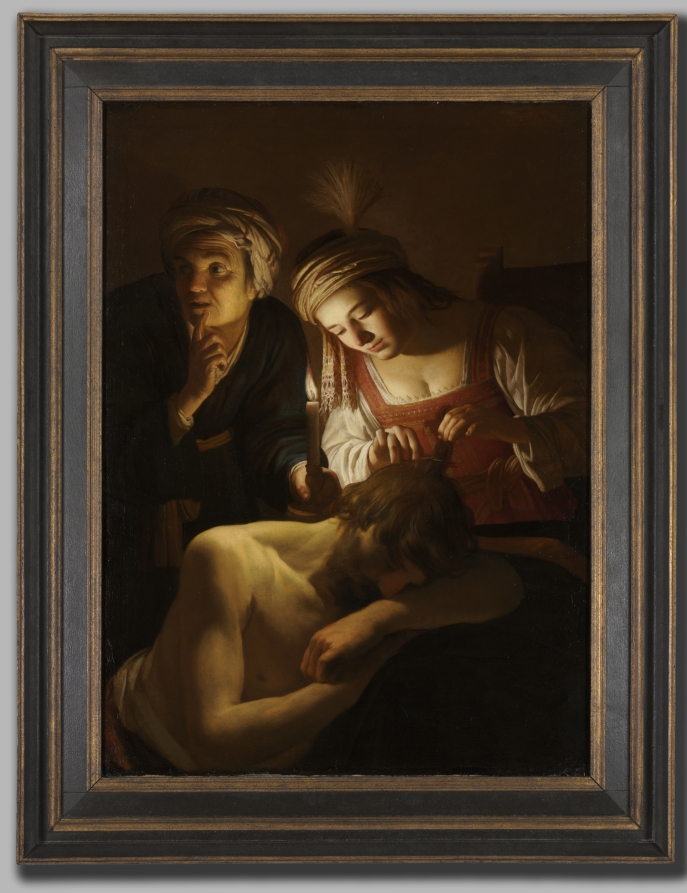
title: Samson and Delilah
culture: Netherlands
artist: Gerrit van Honthorst (Dutch, 1590–1656)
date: c. 1616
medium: oil on canvas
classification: Painting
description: In retaliation for Samson’s single-handed decimation of their army, the Philistines bribed his lover Delilah to discover the source of his strength: his hair, uncut since birth. Samson’s hair was shorn as he lay sleeping in Delilah’s lap, draining his strength and allowing the Philistines to capture him. Honthorst intensified the inherent drama of the scene by limiting his depiction to just three closely packed figures, starkly illuminated by a single candle. The old woman’s silencing gesture involves the viewer in the action, making us complicit in Delilah’s deceit.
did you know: Flickering candlelight and a nocturnal setting enhance the furtive nature of Delilah's actions.